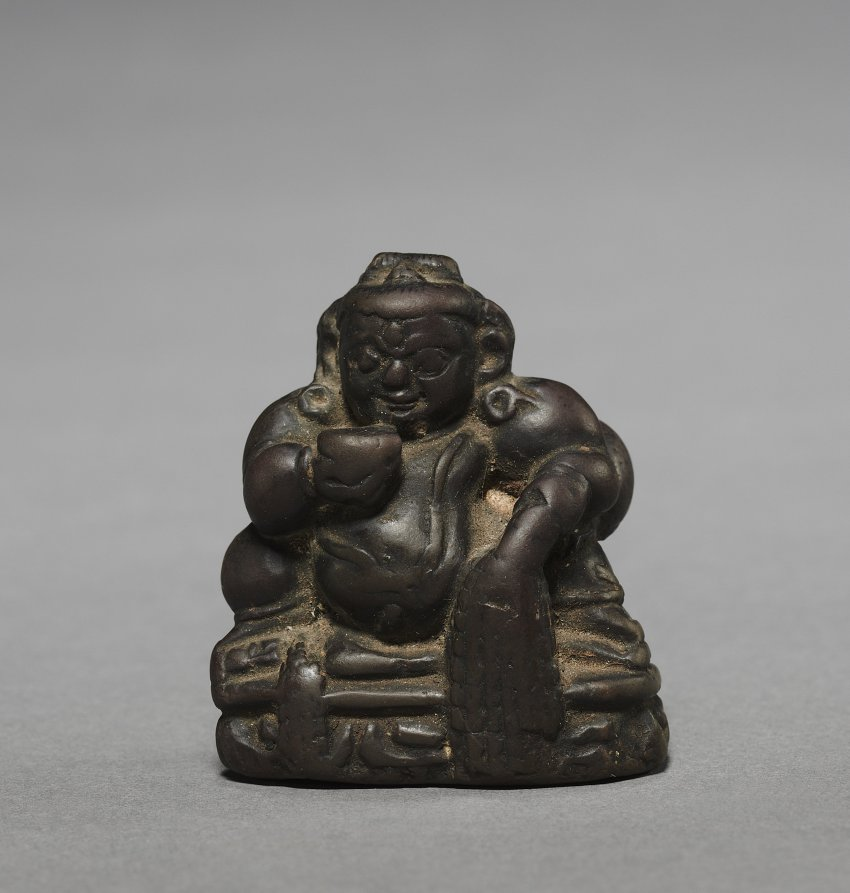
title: Miniature Seated Kubera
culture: Nepal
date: 800s–900s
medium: schist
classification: Sculpture